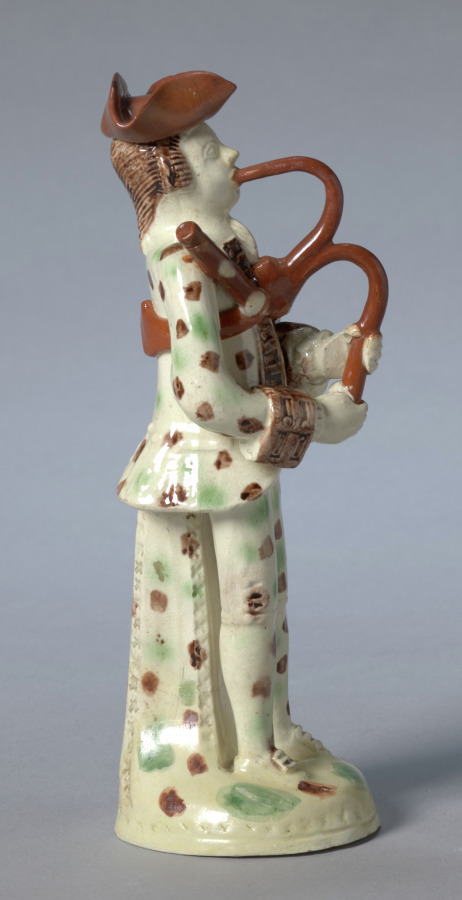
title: Bagpiper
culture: England, Staffordshire, 18th century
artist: Staffordshire Factory (British)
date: c. 1740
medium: earthenware (Astbury-Whieldon type)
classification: Ceramic